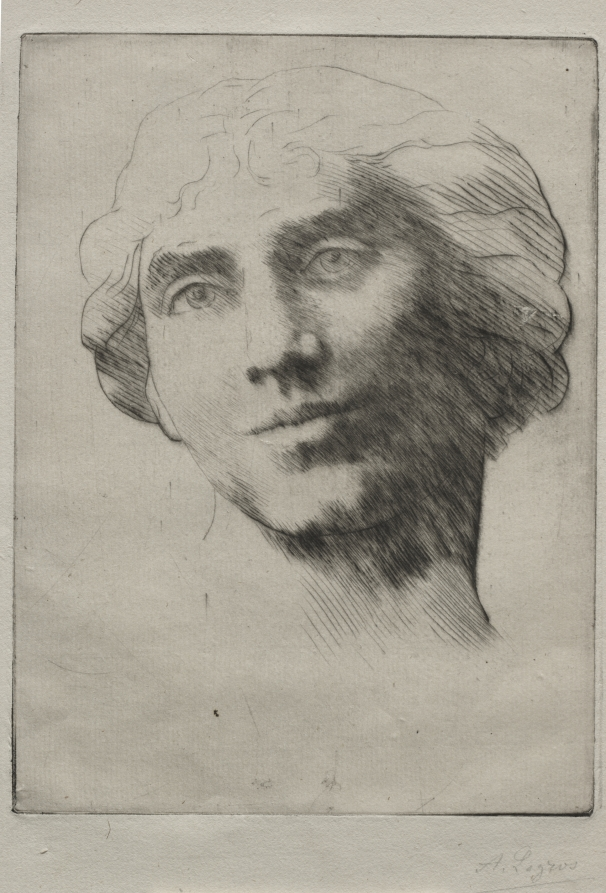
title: Head of a Young Woman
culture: France, 19th-20th century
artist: Alphonse Legros (French, 1837–1911)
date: c. 1857–1911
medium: etching and drypoint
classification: Print